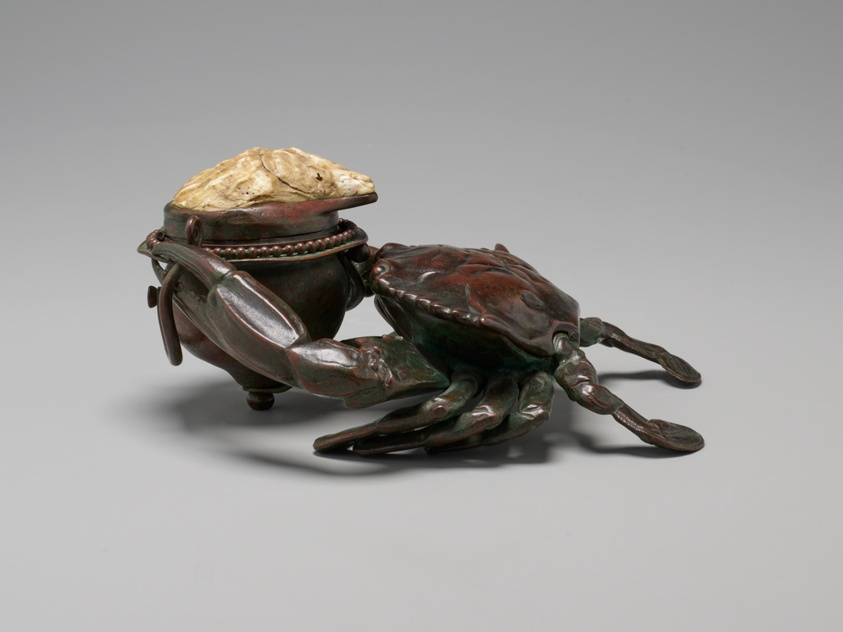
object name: Metalwork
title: “Crab” Inkstand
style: Arts and Crafts Movement, 20th Century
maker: Tiffany Studios (American, 1902–32); Corona, New York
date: c. 1905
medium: Bronze, Favrile glass, and shell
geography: Corona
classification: inkwells; inkwell liners; inkstand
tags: crabs, shells